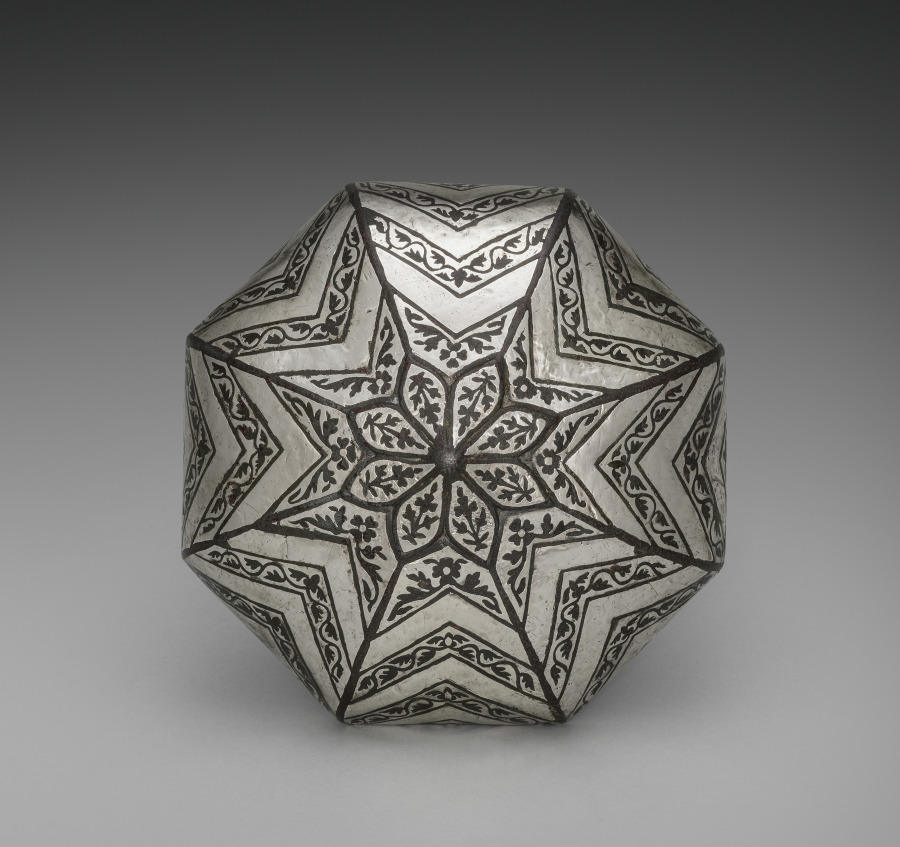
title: Lid for a Bidri Pandan with Chevrons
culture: Southwestern India, Deccan, Karnataka, Bidar​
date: c. 1700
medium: Zinc alloy with silver overlay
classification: Metalwork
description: A pandan is a lidded vessel for serving paan, which has been enjoyed in India for more than two thousand years. Paan is betel or areca nut mixed with lime powder, aromatics such as clove cinnamon, or cardamom, and wrapped in betel leaf. The whole packet is chewed after a meal as a mild stimulant and mouth freshener.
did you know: The lime powder in paan functioned as an ancient antacid after meals.